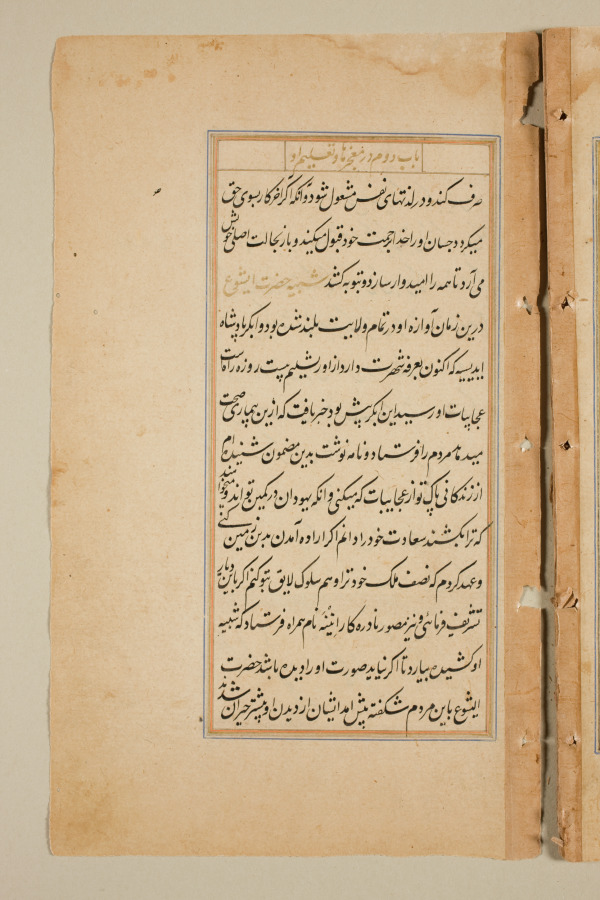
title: Text page from a Mirror of Holiness (Mir’at al-quds) of Father Jerome Xavier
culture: Mughal India, Allahabad, made for Prince Salim (1569–1627)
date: 1602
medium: Ink and gold on paper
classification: Manuscript